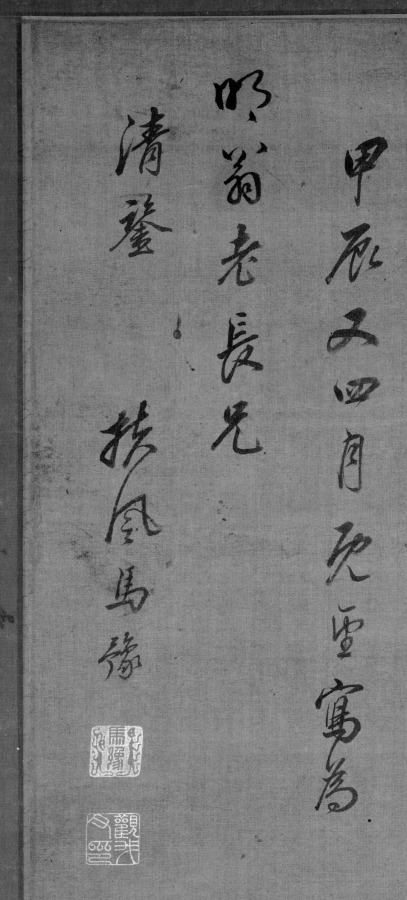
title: Bamboo in the Wind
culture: China, Qing dynasty (1644–1911)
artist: Ma Yu (Chinese, active 1706–1724)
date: 1724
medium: hanging scroll; ink on silk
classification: Painting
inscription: Artist's inscription and signature in upper left corner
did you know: In traditional Chinese culture, bamboo symbolizes a gentleman's virtuous resilience and flexibility.